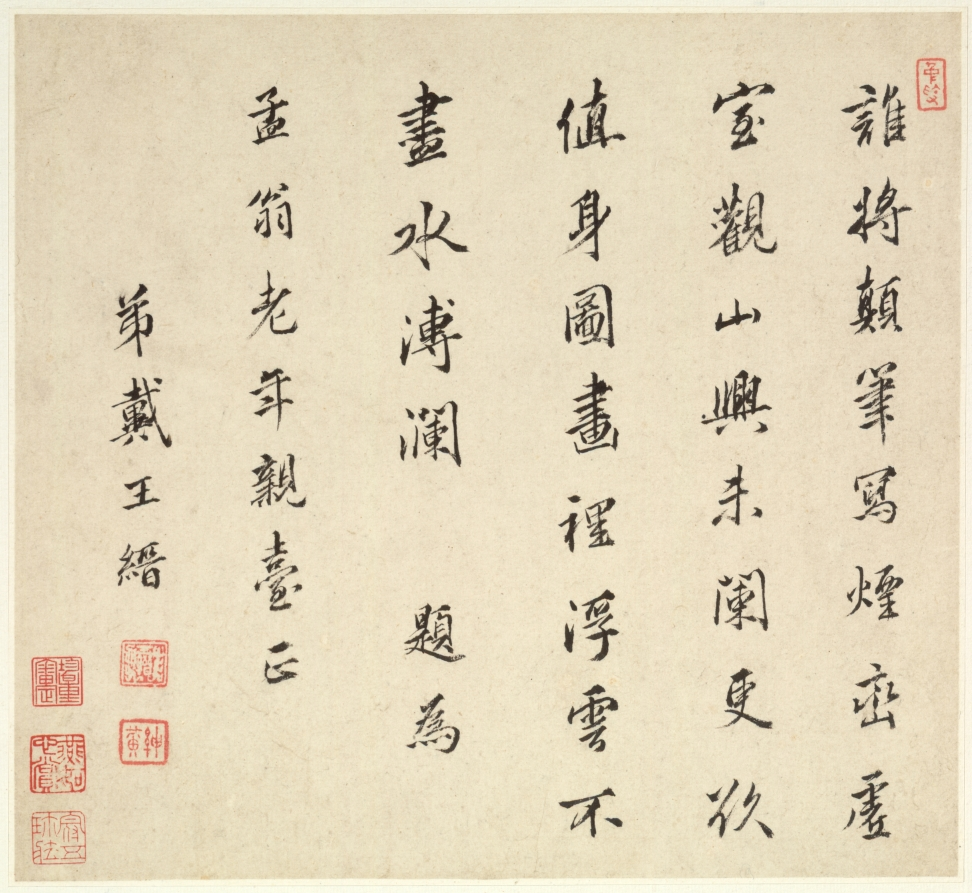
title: Album of Landscapes: Leaf 5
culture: China, Qing dynasty (1644-1911)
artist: Wang Gai (Chinese, active c. 1677–1705)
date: 1677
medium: album leaf, ink and light color on paper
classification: Painting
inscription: Artist's inscription, signature, and seal on leaf 5: In imitation of (T'ang) Wang Hsia's use of ink. Wang Gai of Hsiu-shui (seal) Gai Poem by Tai Wang-chin